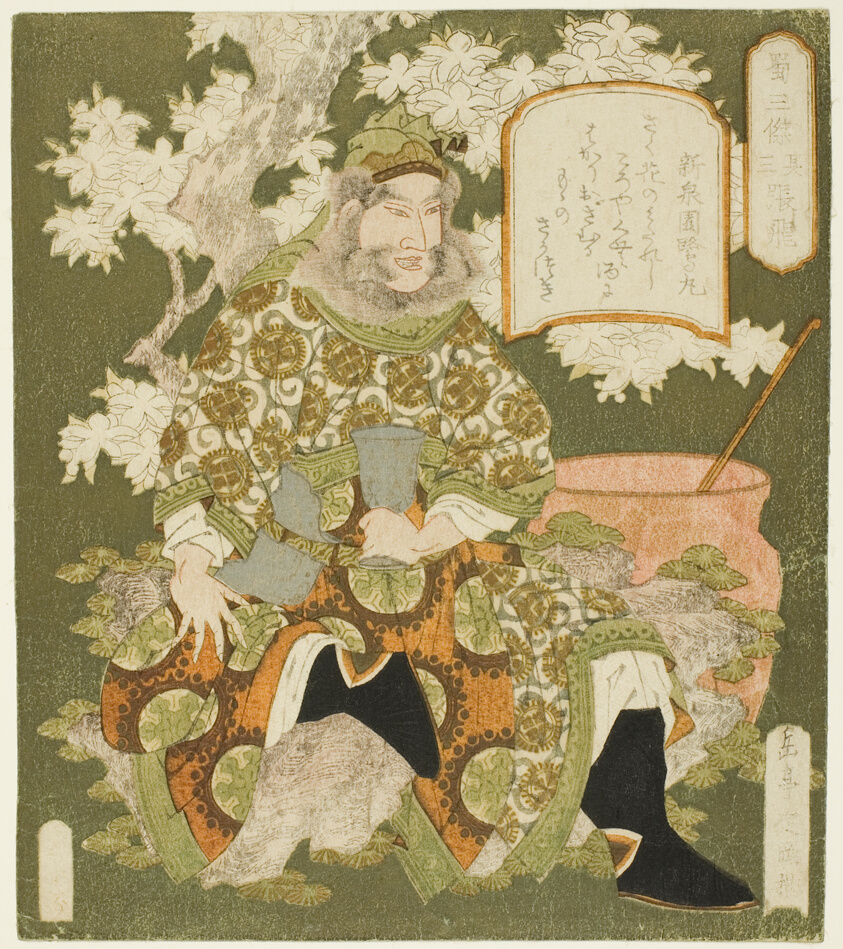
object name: Print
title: No. 3: Zhang Fei (Sono san: Chohi), from the series "Three Heroes of Shu (Shoku sanketsu)"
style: Japanese (culture or style)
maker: Yashima Gakutei (Japanese, 1786 (?)-1868)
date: c. 1824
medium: Color woodblock print; shikishiban, surimono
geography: Japan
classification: woodblock print; print; asian art